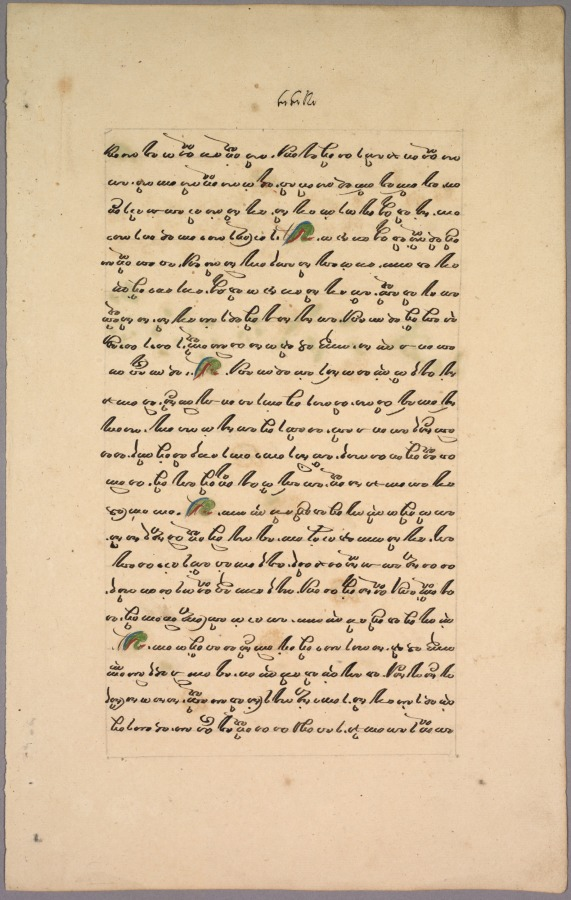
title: Page from Ramayana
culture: Java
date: 1800s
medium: ink on paper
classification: Manuscript